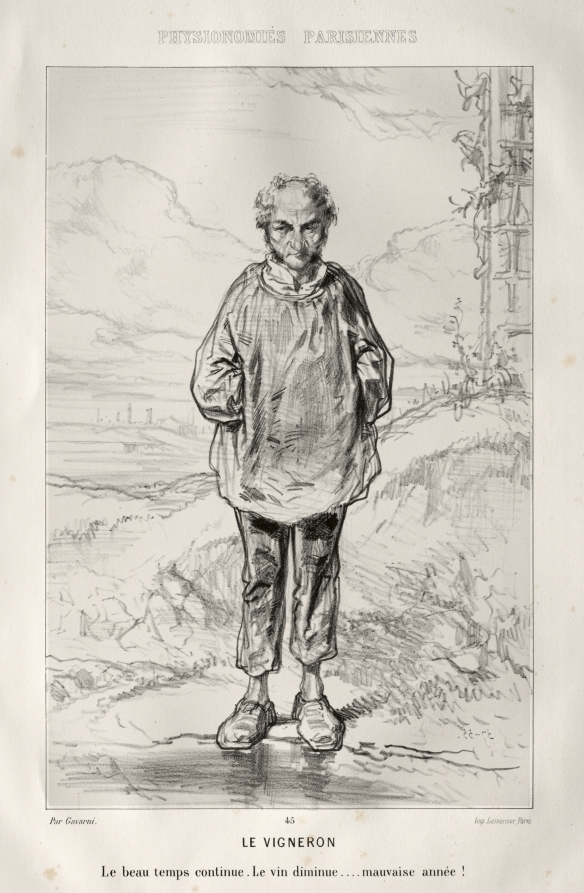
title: Le Vigneron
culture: France, 19th century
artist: Paul Gavarni (French, 1804–1866)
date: c. 1857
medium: lithograph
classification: Print